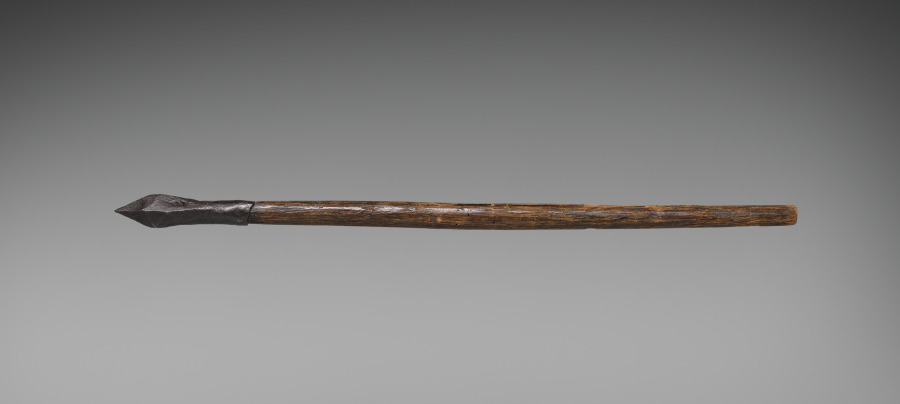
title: Crossbow Bolt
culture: Germany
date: 1600s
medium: wooden shaft, steel head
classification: Arms and Armor